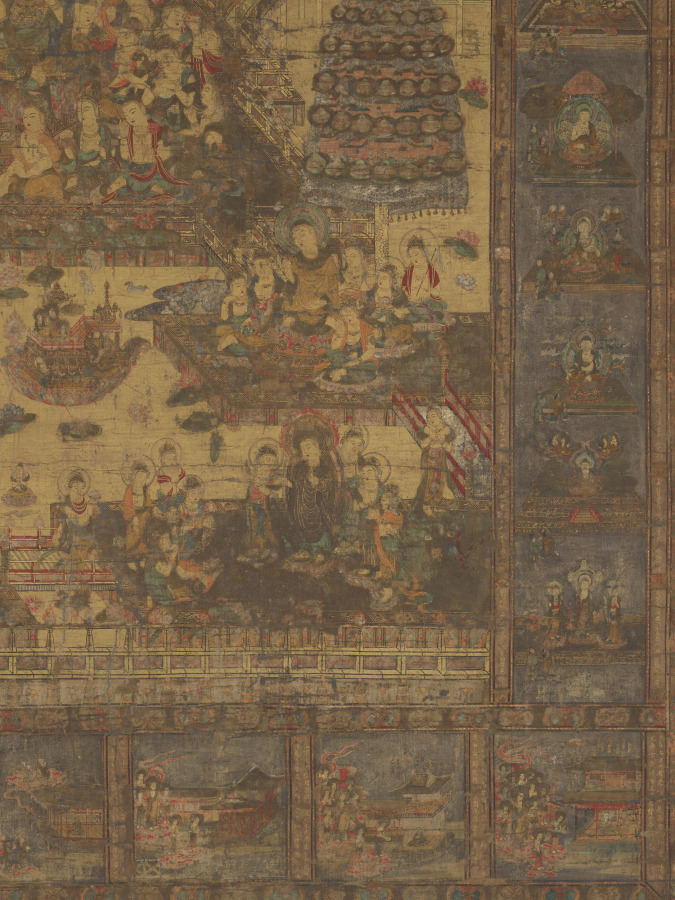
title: Taima Mandala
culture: Japan, Kamakura period (1185–1333)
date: early 1300s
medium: hanging scroll; ink, color, and gold on silk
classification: Painting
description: This painting is a copy after an 8th-century woven mandala belonging to the temple Taimadera. The composition is based on a sacred text that describes the Buddha Shakyamuni’s explanation of Amida’s Pure Land to Queen Vaidehi, as well as his instructions to her on visual meditation upon the Pure Land. The Pure Land appears at the center of the painting. To the left is the story of Queen Vaidehi’s encounter with Shakyamuni, and to the right are the scenes she is given to visualize. The bottom illustrates the nine levels of birth that can be attained in the Pure Land.